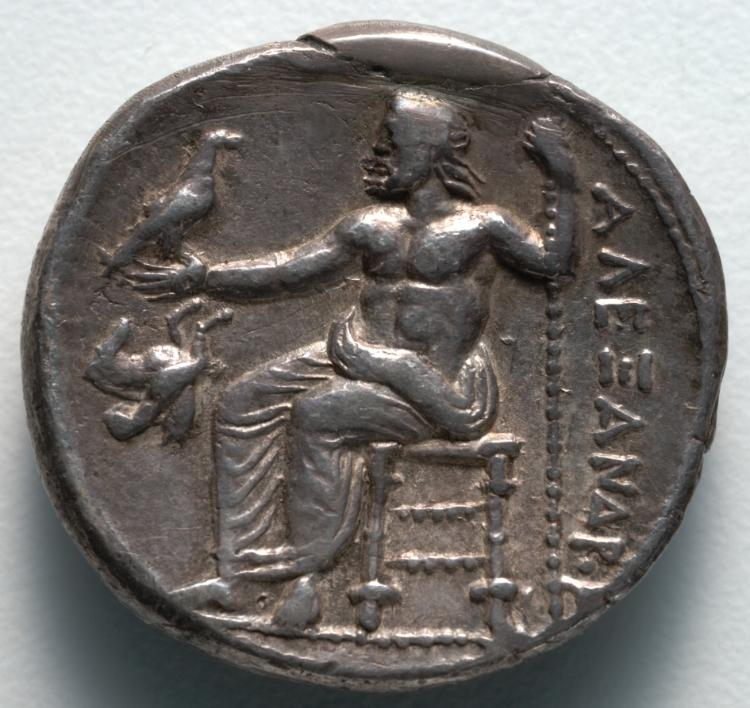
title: Tetradrachm: Zeus (reverse)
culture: Greek, Macedonian, minted at Amphipolis (Macedonia), reign of Alexander III [The Great]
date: 336–323 BCE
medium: silver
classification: Coins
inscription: ΑΛΕΞΑΝΔΡΟΥ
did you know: The Pegasos protome beside Zeus (on the reverse) indicates that this coin was minted at Amphipolis.